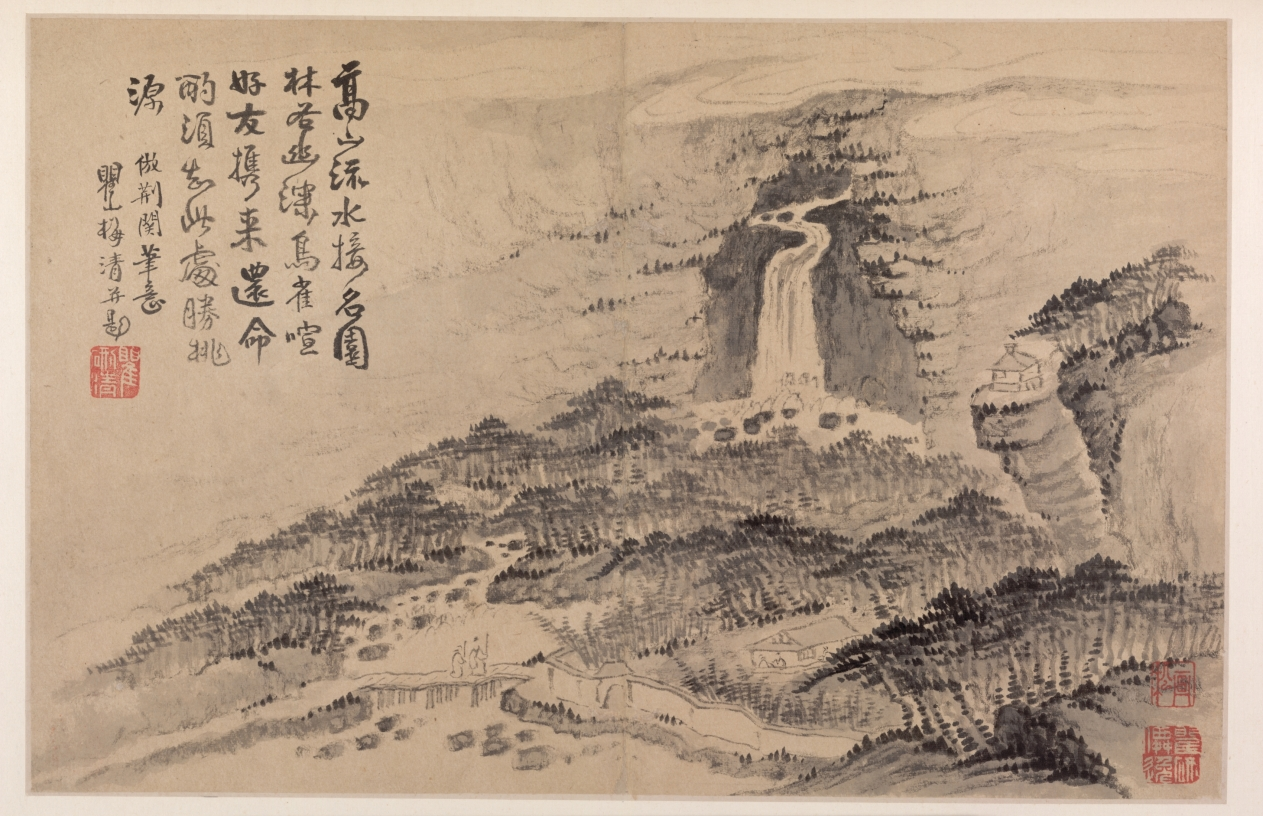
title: Landscapes after Various Styles of Old Masters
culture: China, Qing dynasty (1644-1911)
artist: Mei Qing (Chinese, 1623–1697)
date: 1690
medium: album leaf: ink and color on paper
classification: Painting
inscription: Summer Leaf II (formerly Leaf I). Artist's inscriptions, signature, and seals: Tall mountains and falling water adjoin a famous garden,/ In a wooded gorge, deep and remote, small birds chirp./ Old friends who bring me along and entertain me at a feast/ Should know this place is superior to the Peach Blossom Spring. Imitating Jing [Hao] and Guan [Tong] brush ideas. Mei Qing of Qushan [painted] and inscribed [seal] Quxing, Qing [2 seals, lower right corner] Huasong; Quxing hsien-i.